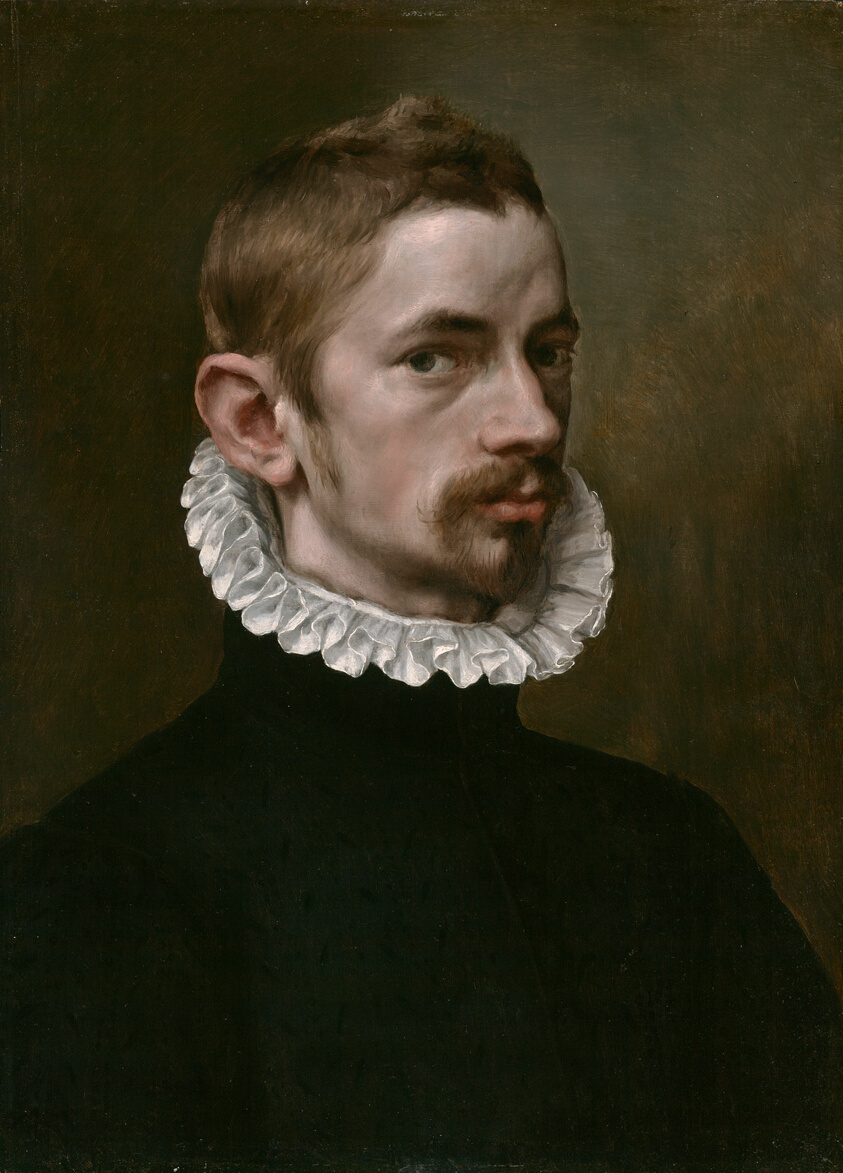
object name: Painting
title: Portrait of a Man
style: 16th Century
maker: Flemish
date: c. 1575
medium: Oil on panel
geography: Flanders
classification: oil on panel; paint; portrait; painting; european painting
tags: man, portraits: male subject, portrait, men